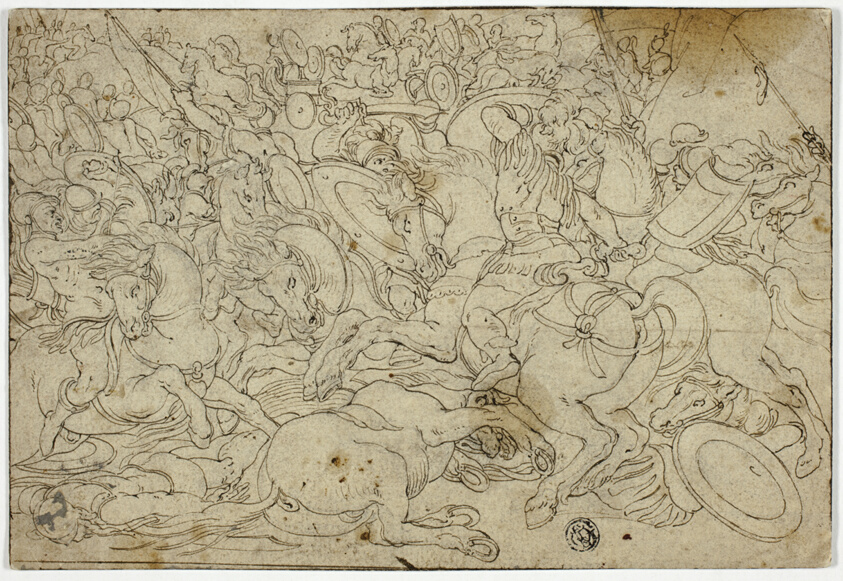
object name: Drawing and Watercolor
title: Alexander Defeating Darius at Battle of Issus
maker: Unknown Artist; French, 17th century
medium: Pen and brown ink, over traces of black chalk, on tan laid paper, laid down on tan laid paper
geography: France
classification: pen and ink drawings; drawings (visual works); prints and drawing